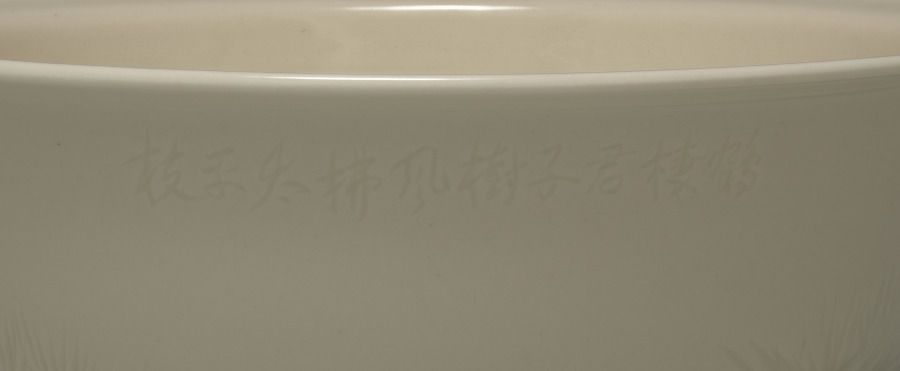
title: Bowl with Old Pine and Poem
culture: Japan, Taishō period (1912–26) or Shōwa period (1926–89)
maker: Seifū Yohei IV (Japanese, 1872–1951)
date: 1914–46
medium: Porcelain with molded and carved design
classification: Ceramic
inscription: 鶴樹君子風拂太平枝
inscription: 清風造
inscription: 清風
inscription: 成山清風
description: A grand, aged pine is carved into the body of this bowl. The inscription on the reverse side explains the tree’s presence. It is an altered version of two lines from a poem by Li Jiao (646?–715?) called “Pine.” Li Jiao was a senior government official who had a tumultuous career under the reign of Wu Zetian (r. 690–705), as well as those of her sons and grandson during the Tang dynasty (618–907). Although little known today, his work was read in Japan during the Heian (794–1185) and Kamakura periods (1185–1333). An anthology containing his poems, which was lost in China, was passed down across the generations in Japan. The translation of the inscription is as follows (the original characters, written and read from right to left, are shown below from left to right): The crane nests in the mastwood tree, the wind flicks at its peaceful branches. 鶴樹君子風拂太平枝 The mastwood is a pine-like evergreen, and the crane sheltering there is protected from the wind. In the original poem, the characters before “branches” (枝) are rather 大夫, meaning “high official.” This is likely a reference to the title bestowed upon a pine tree by the emperor Qin Shi Huang (r. 221–210 BCE) in thanks for its protection when a fierce rain fell as he ascended Mount Tai to pay his obeisance to the heavens.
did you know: The box inscription identifies the bowl's glaze as kanpakuyū, "bright-jewel white glaze."